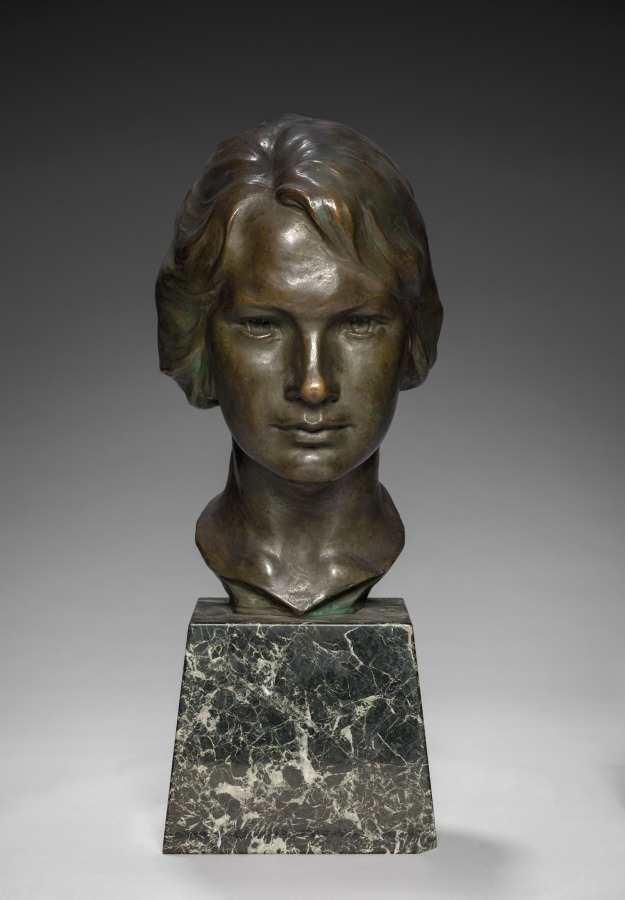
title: Head of a Girl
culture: America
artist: Nancy Coonsman (American, 1888–1920)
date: c. 1920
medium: bronze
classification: Sculpture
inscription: signed back of neck: Nancy Coonsman © R.C. & N.M. Vose/Roman Bronze Works New York.